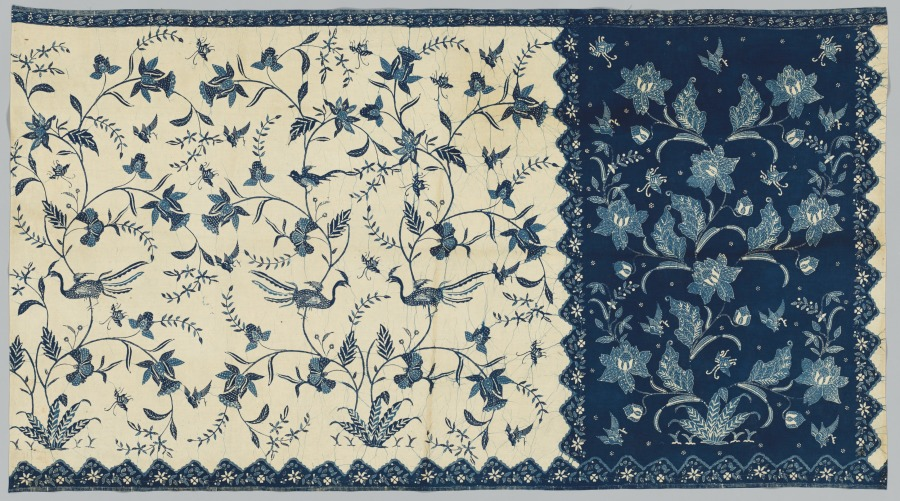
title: Sarong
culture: Indonesia, Java, North Coast, mid-19th century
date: mid-1800s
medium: Cotton: plain weave, wax-resist dyed (batik)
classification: Textile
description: Batiks made in the North Coast region of Java, specifically in Pekalongan, were influenced by both Indian and European motifs due to the Dutch presence in Indonesia. In this sarong we see a mixture of Indian and European flowers including jasmine, lilac, and daffodil. Batik is a wax-resist dyeing technique used throughout Java. Hot wax is applied with a tool known as a canting and a design is hand drawn with incredible skill. This sarong was then dyed with indigo, a well sought after and culturally important natural dye. Areas on the fabric with wax will not accept the indigo dye, hence the term wax-resist.